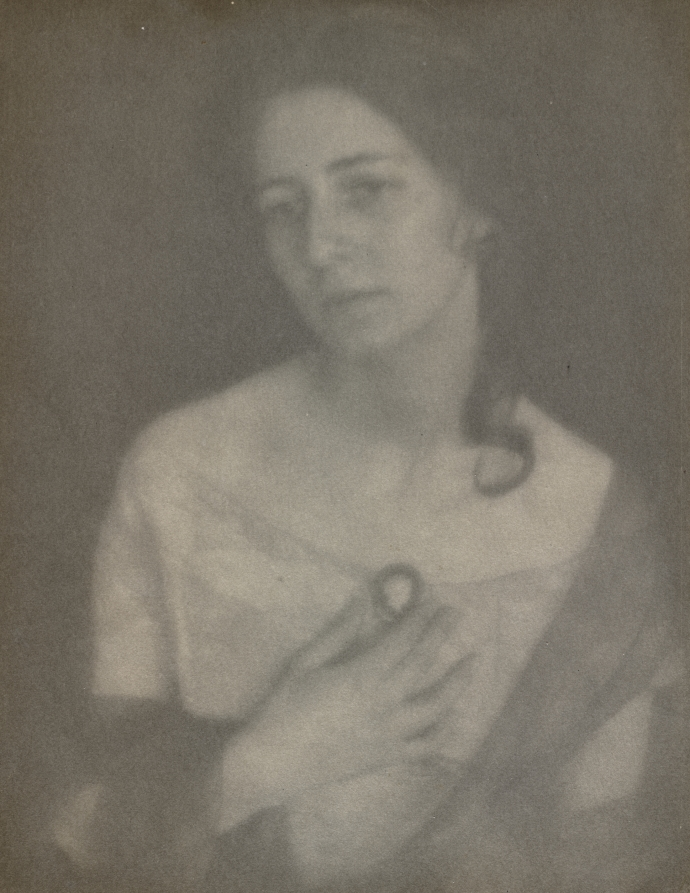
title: Julia Hall McCune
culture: America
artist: Clarence H. White (American, 1871–1925)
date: 1903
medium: platinum print with pencil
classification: Photograph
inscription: Written in ink on verso: "48"